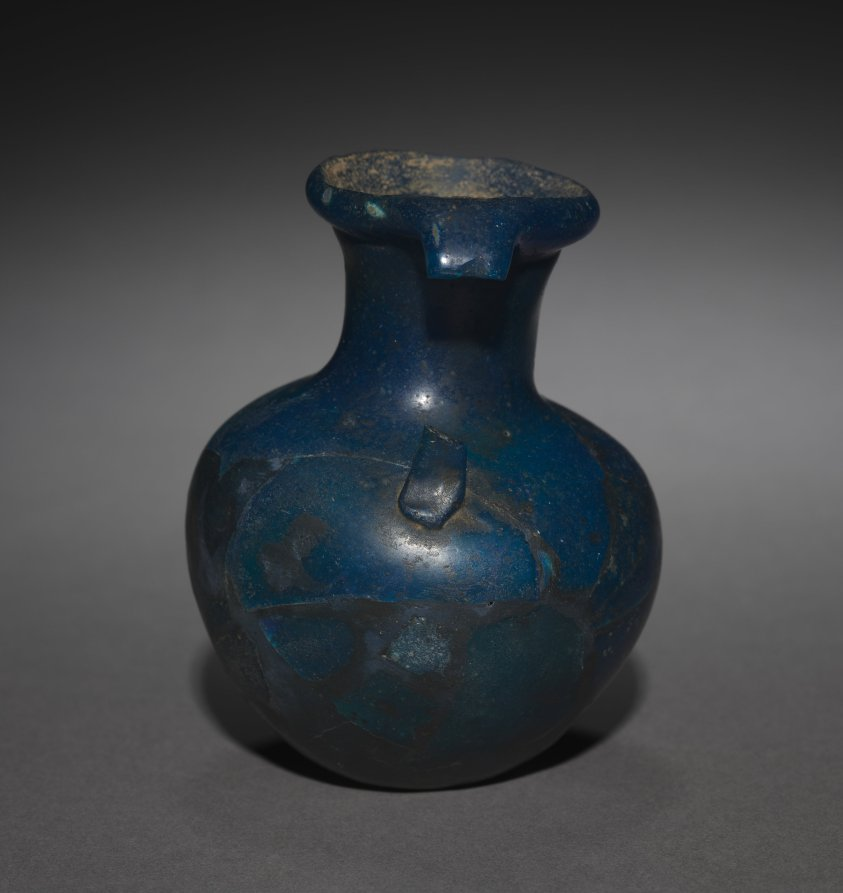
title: Long-Necked Flask with Strap Handle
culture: Egypt, New Kingdom (1540–1069 BCE), Dynasty 18, reign of Amenhotep III (1390–1352 BCE) or later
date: 1391–1353 BCE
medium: glass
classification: Vessels